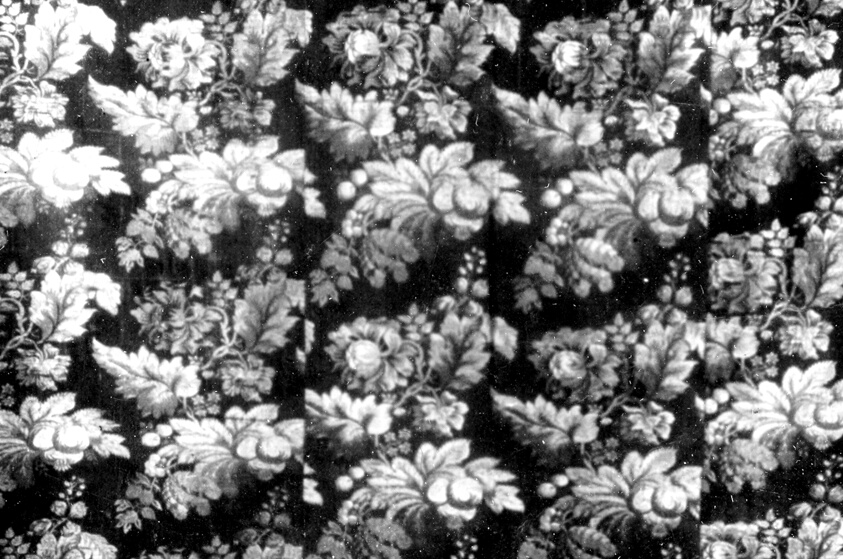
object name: Textile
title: Panel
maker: France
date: 1725/75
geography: France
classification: textile; weaving